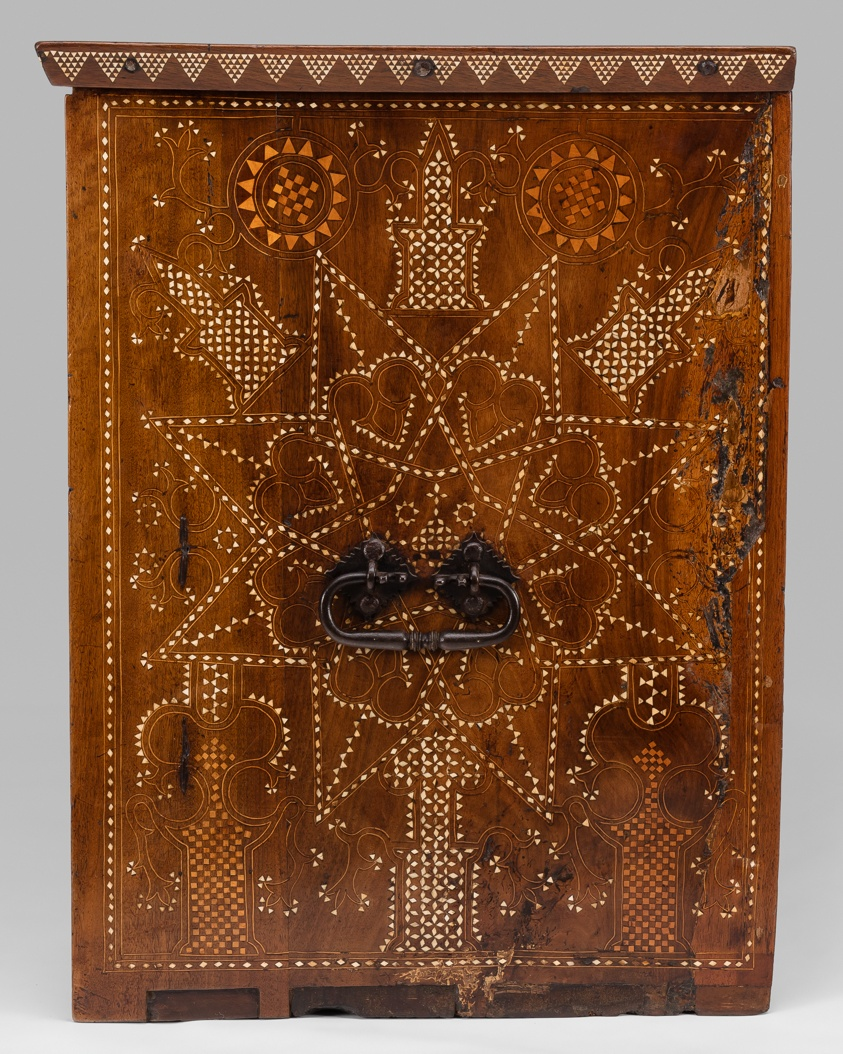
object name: Furniture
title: Writing Cabinet (Escritorio)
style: Islamic, hispano-moresque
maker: Spanish, possibly Granada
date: 1500/50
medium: Walnut, boxwood, bone, iron, copper alloy, and gilding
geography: Granada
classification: furniture; islamic; decorative arts; furnishings; furnishings (transportable); inlay; writing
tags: geometric